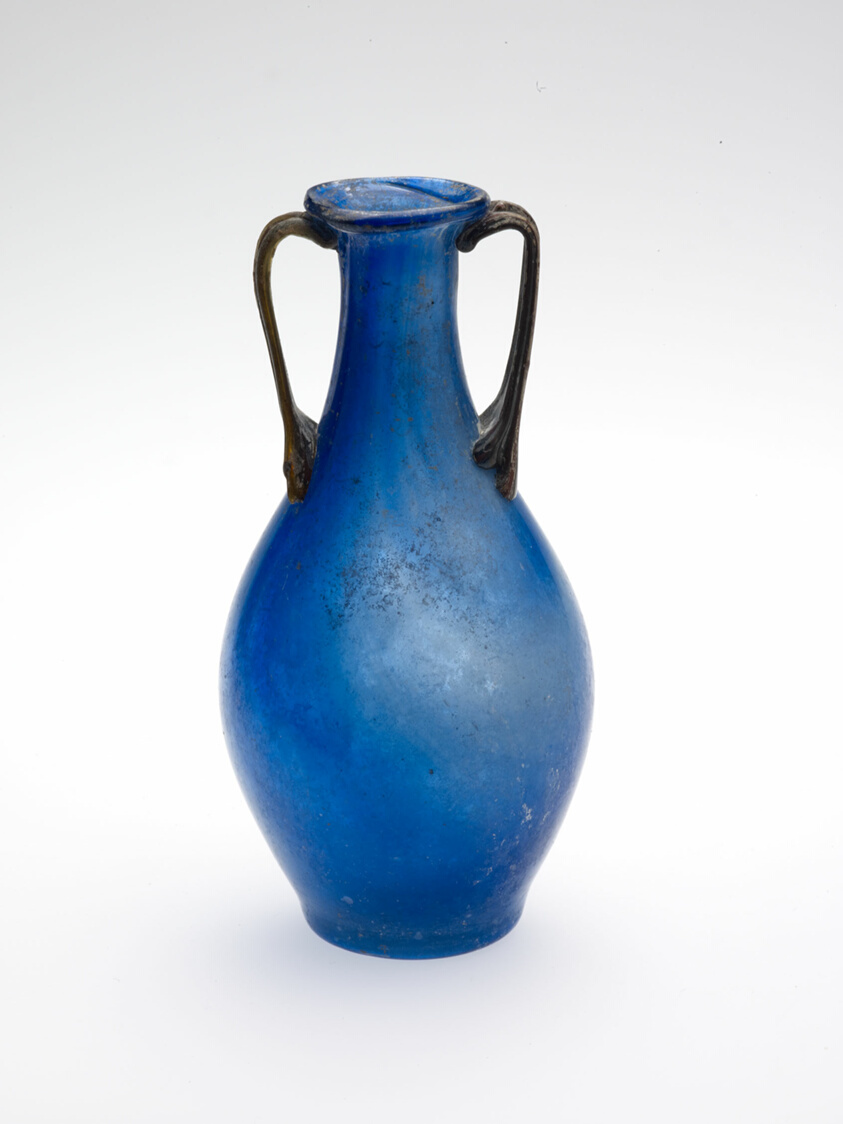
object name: Vessel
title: Bottle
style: roman (ancient, style or period), ancient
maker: Roman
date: 1st century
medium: Glass, blown technique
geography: Syria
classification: bottle; glass; vessel; ancient art